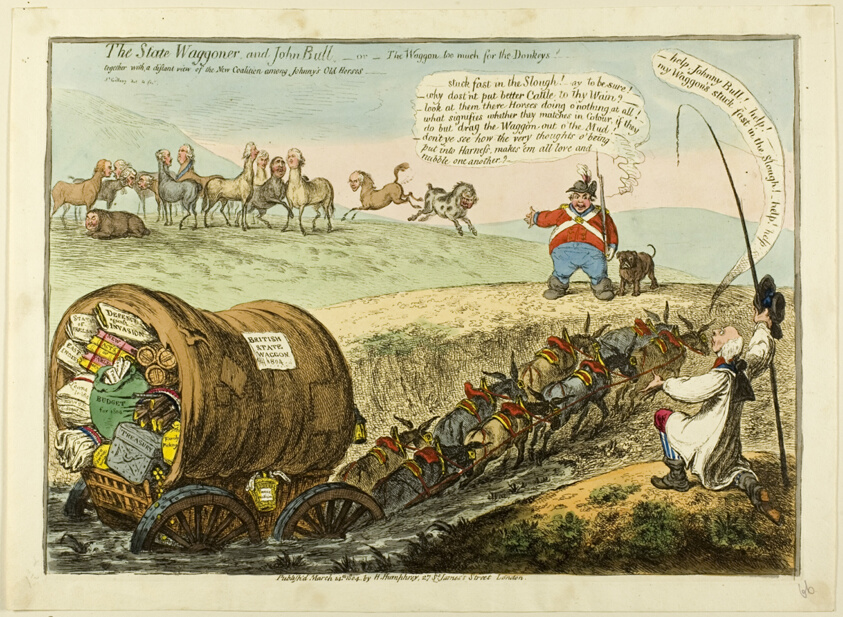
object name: Print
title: The State Waggoner and John Bull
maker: James Gillray (British, 1756-1815); published by Hannah Humphrey (English, c. 1745-1818)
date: 1804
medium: Etching, with hand-coloring, on paper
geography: England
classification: etching; print; prints and drawing